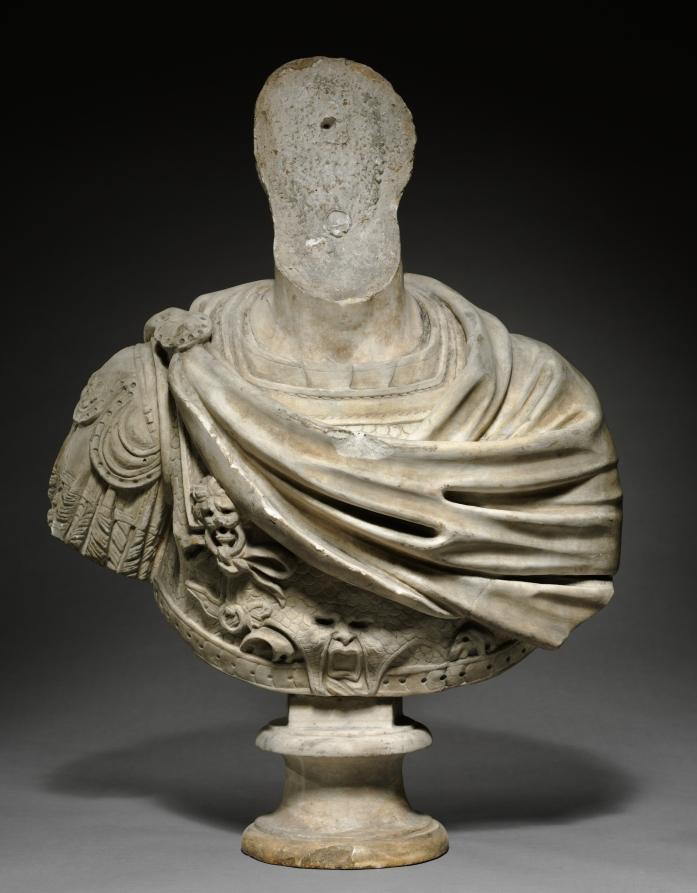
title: Bust of a Man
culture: Italy, Face: Roman, early 2nd century or later; Body: 16th century or later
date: Face: early 2nd century or later. Body: 1500s or later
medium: marble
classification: Sculpture